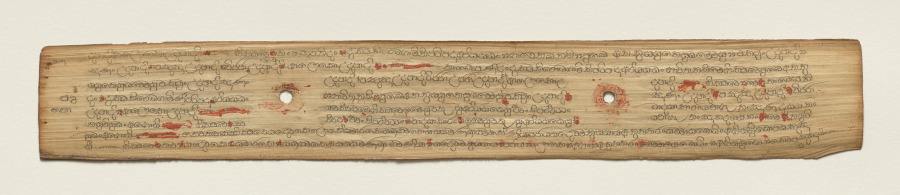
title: Leaf from a Buddhist Manuscript (recto)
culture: Sri Lanka, Singhalese, Late 17th century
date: c. 1700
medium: fiber paper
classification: Manuscript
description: Palm leaf material is still used for manuscripts in Sri Lanka. The palm leaves are prepared first by boiling them, drying them in the sun, and then rubbing them with oils. Scribes then use a metal stylus to incise the text. Then charcoal powder is wiped across the pages, filling in only the inscribed lines.